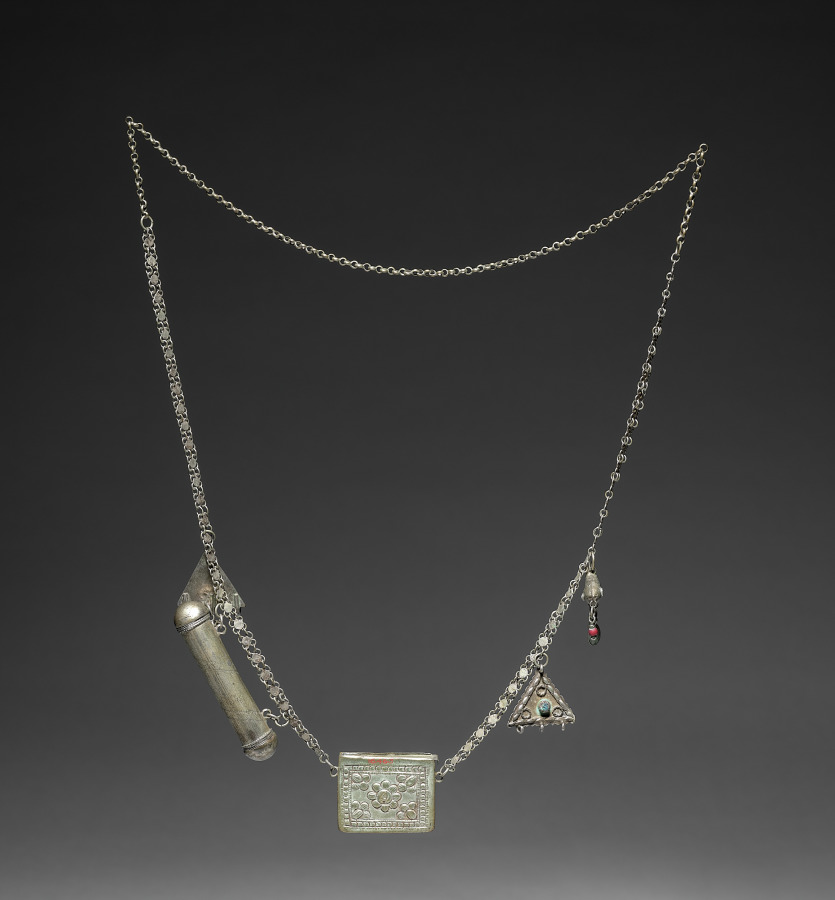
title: Chain with Two Charm Cases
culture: India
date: 1800s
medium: silver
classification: Jewelry